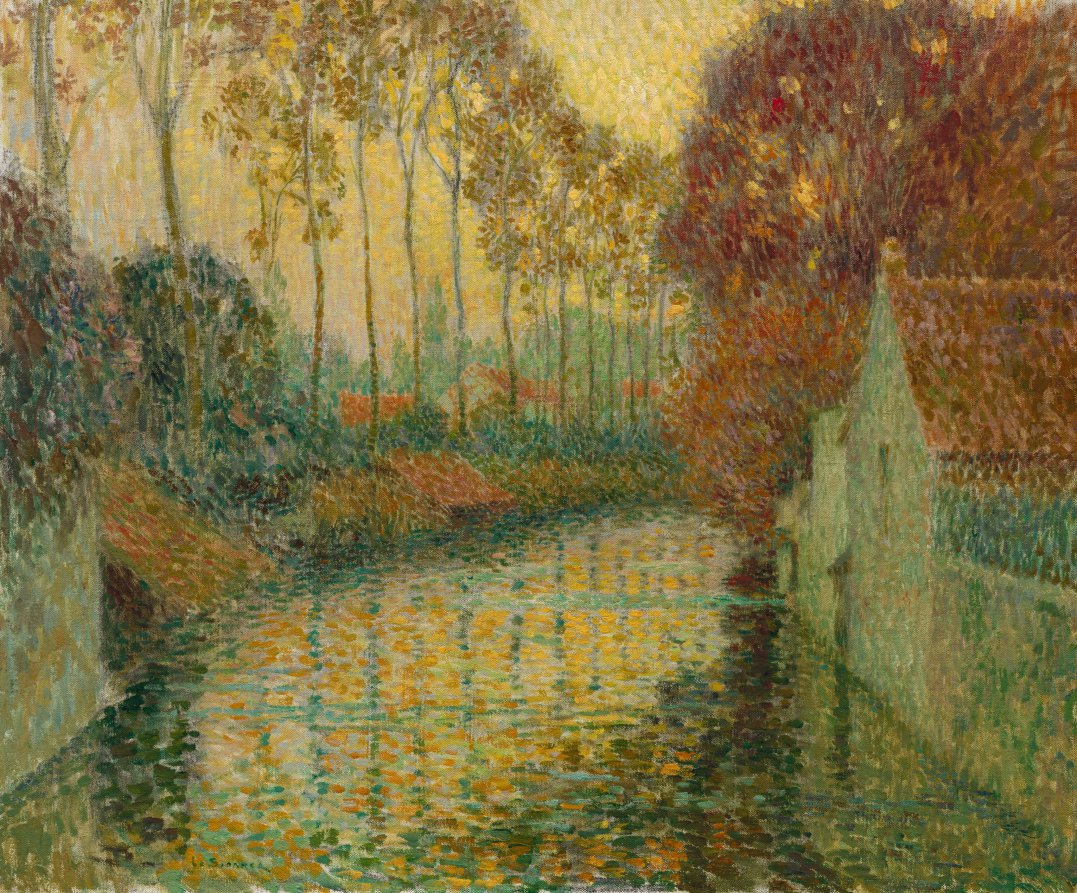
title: Canal in Autumn (Gisors)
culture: France, early 20th century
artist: Henri Le Sidaner (French, 1862–1939)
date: 1913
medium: oil on canvas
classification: Painting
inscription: Distinguishing marks on canvas face: signed with green painting in the lower left: "Le Sidaner"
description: This painting depicts a canal in Gisors, a commune in Normandy, about 40 miles northwest of Paris on the river Epte. Le Sidaner painted this work in a Divisionist technique of applying pure color in large, broken strokes, often separated by areas of white or gray. Unlike the Impressionists, Le Sidaner preferred a restrained palette of delicately nuanced tones that evoke a mood of quiet mystery. His views of old canals, typically portrayed in a crepuscular or nocturnal light, and completely absent of figures, allude to the passage of time and a timeless eternity that exceeds the human life span.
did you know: Le Sidaner often painted from memory rather than directly on site, and his subdued use of color applied in uneven brushstrokes bring a poetic, dreamlike effect to his paintings.